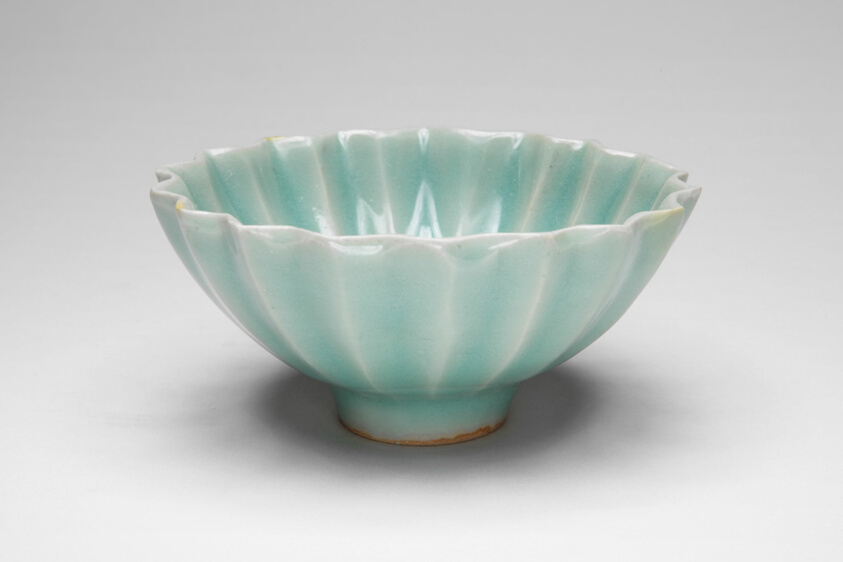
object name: Vessel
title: Fluted Bowl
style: Chinese (culture or style)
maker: China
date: Southern Song dynasty (1127–1279)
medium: Longquan ware; stoneware with underglaze molded decoration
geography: China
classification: bowl; dish (vessel); vessel